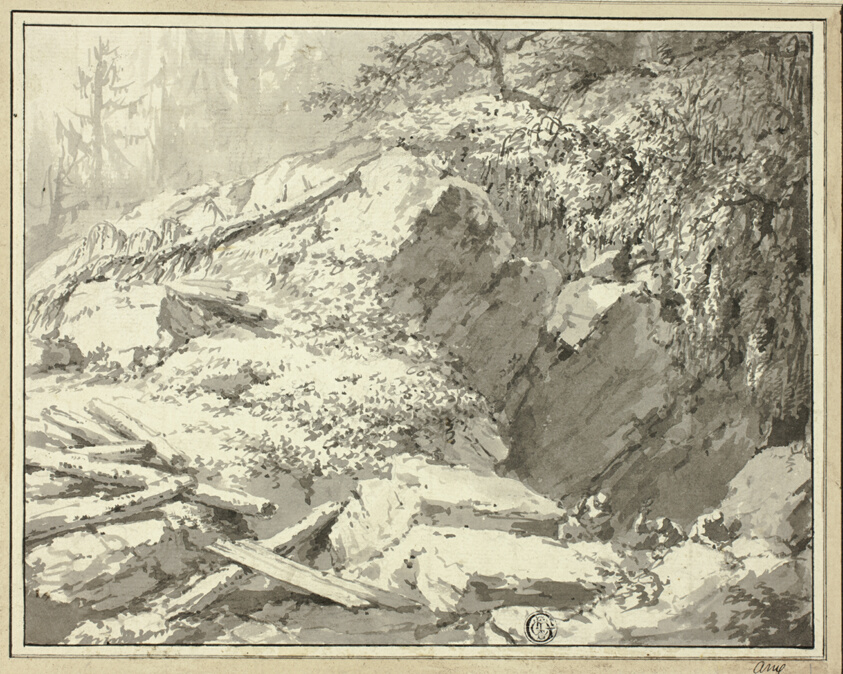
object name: Drawing and Watercolor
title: Mountainside with Fallen Tree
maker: Friedrich Wilhelm Gmelin; German, 1760-1820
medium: Brush and gray wash over black chalk, on ivory laid paper, laid down on ivory wove card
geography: Germany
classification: ink or chalk wash; drawings (visual works); prints and drawing